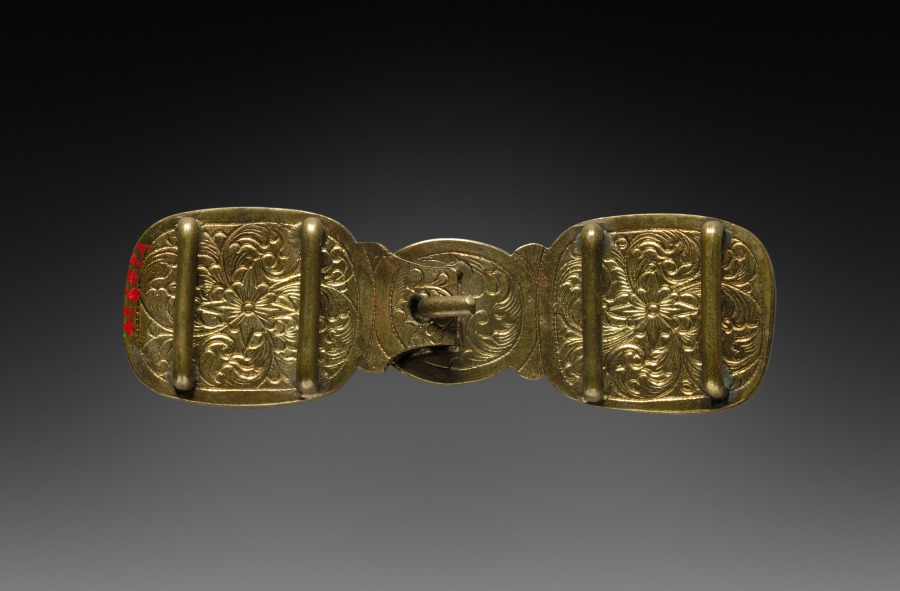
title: Buckle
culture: China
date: 1900s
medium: Brass, engraved and set with pink glass and jade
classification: Jewelry